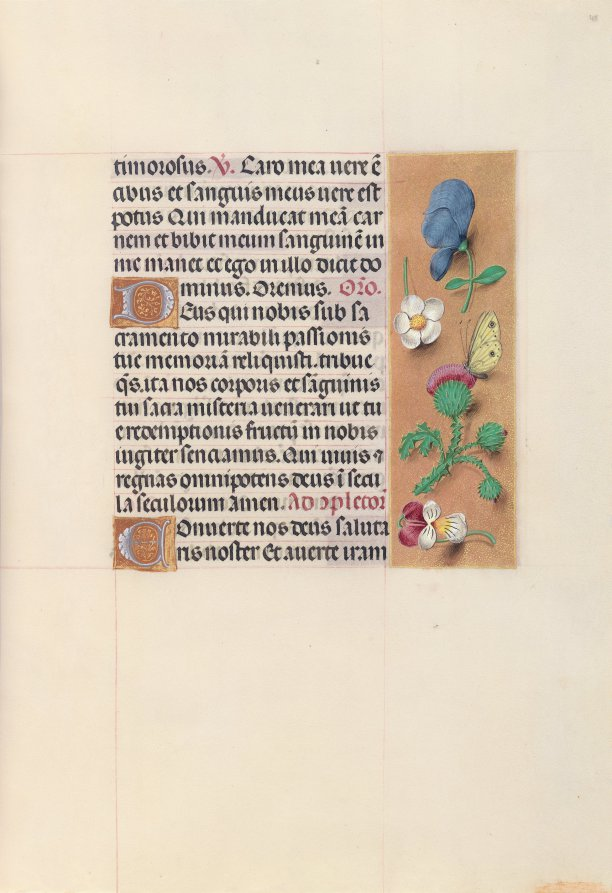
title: Hours of Queen Isabella the Catholic, Queen of Spain: Fol. 48r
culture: Flanders, Ghent and Bruges, late 15th century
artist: Master of the First Prayerbook of Maximillian (Flemish, c. 1444–1519)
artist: and Associates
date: c. 1500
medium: ink, tempera, and gold on vellum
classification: Bound Volume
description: This manuscript was illuminated by a circle of at least five highly organized manuscript painters active in the Flemish cities of Ghent and Bruges. The principal illuminator was Alexander Bening, who painted the majority of the book's miniatures. Manuscripts produced by this circle of artists are renowned for the decoration of their borders, which typically feature a rich variety of realistically-painted flowers, birds, and butterflies. This prayer book, called a book of hours, was intended not for a cleric, but for the private devotions of a lay person-in this case, Isabella the Catholic, Queen of Spain (1451-1504). Isabella's coat of arms embellishes the book's frontispiece. It is unlikely that the book was commissioned by the Queen herself; rather, she probably received it as a diplomatic gift from someone courting her patronage, perhaps Cardinal Francisco Jimenez de Cisneros. A Franciscan friar, Jimenez was dependent upon Isabella for his advancement, first to the post of Queen's confessor in 1492, and then to Archbishop of Toledo in 1495.